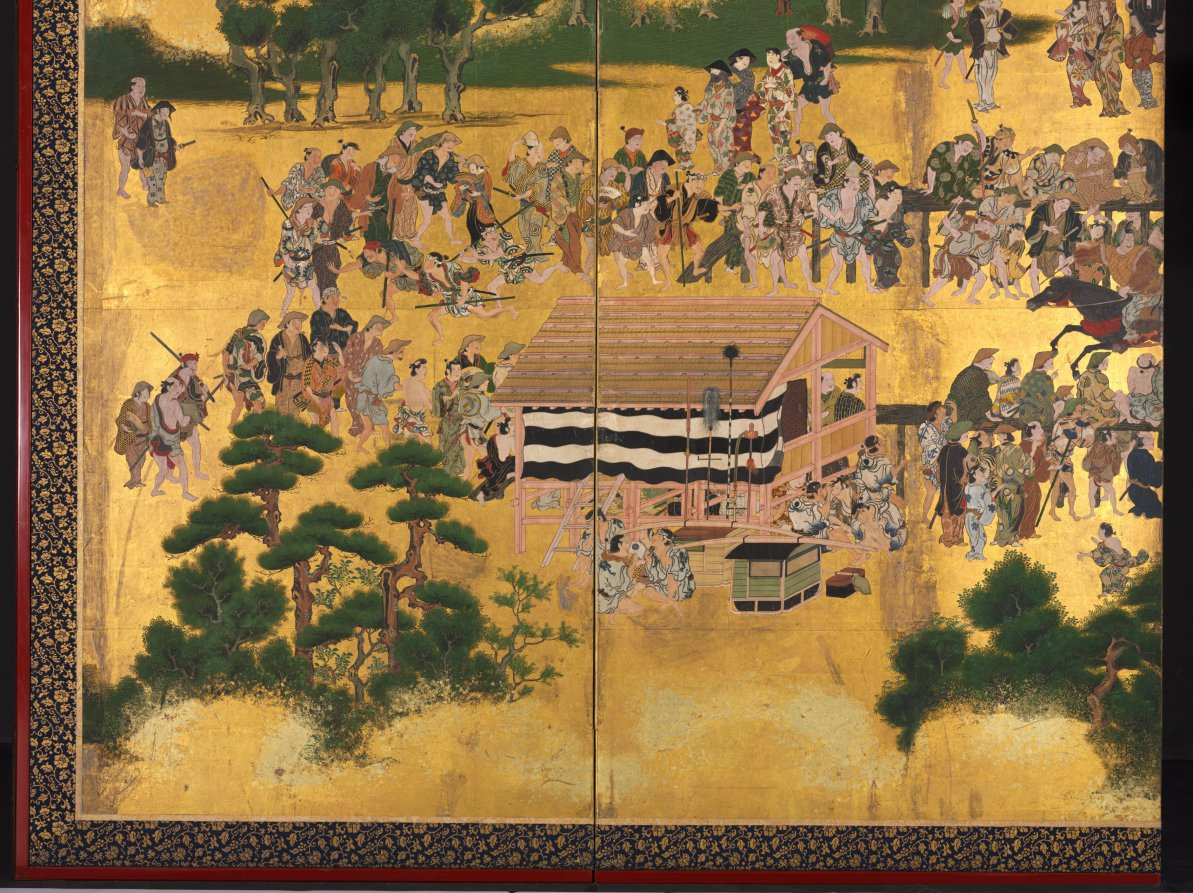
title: Horse Race at the Kamo Shrine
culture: Japan, Edo period (1615–1868)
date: early to mid-1600s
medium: One of a pair of six-panel folding screens; ink and color on gilded paper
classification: Painting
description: Kamo Shrine in Kyoto, seen in the upper half of the left screen, has held an annual horse race on May 5th since the ninth century. Serving as a snapshot of the festivities, this pair of screens captures nearly 600 people watching the race, beginning at the bottom part of the right screen and continuing to the left. The race is a great spectacle where aristocratic riders cling to their fast and unwieldy mounts. While many of those in attendance seem in rapt attention to the main event, other vignettes depict people engaged in an array of activities. This pair of screens was likely originally part of a group of linked murals.